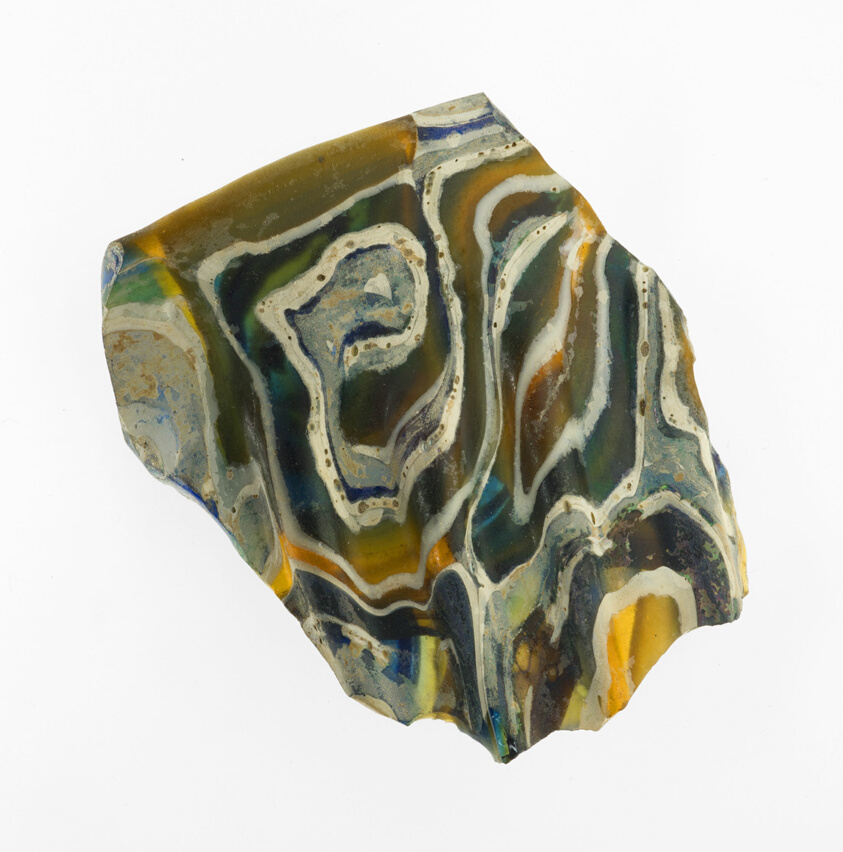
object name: Decorative Arts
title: Bowl Fragment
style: roman (ancient, style or period), ancient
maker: Roman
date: Late 1st century BCE-mid–1st century CE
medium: Glass, mosaic glass technique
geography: Roman Empire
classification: fragment; vessel; bowl; decorative arts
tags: decoration